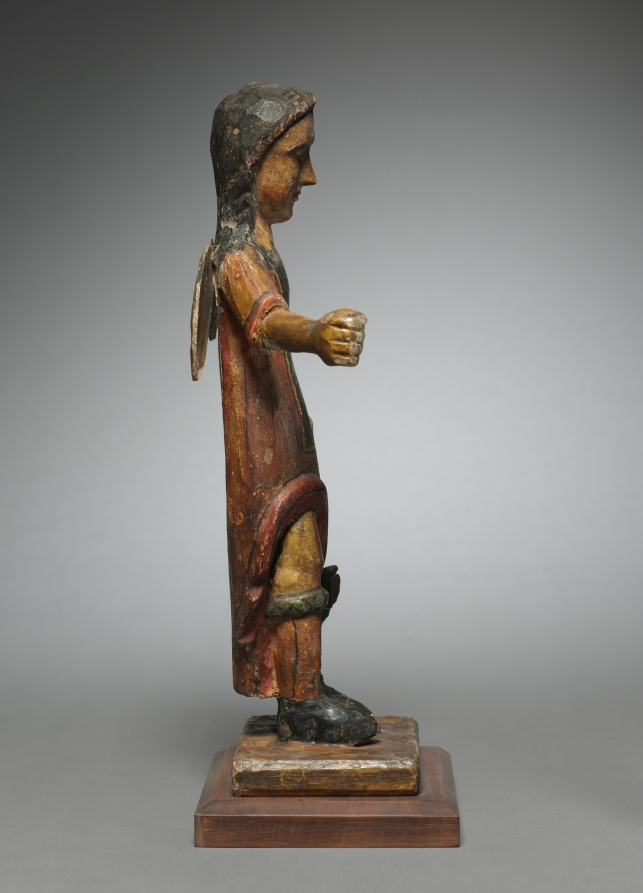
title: San Rafael - Archangel: santo de bulto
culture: America, New Mexico, 17th-18th century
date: 1600s-1700s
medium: painted wood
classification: Sculpture